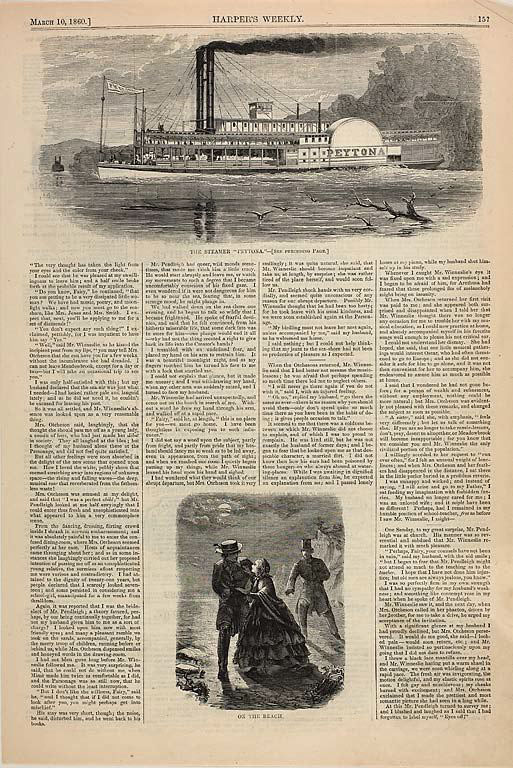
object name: Print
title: On the Beach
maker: Winslow Homer (American, 1836-1910); published by Harper's Weekly (American, 1857-1916)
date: published March 10, 1860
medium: Wood engraving on paper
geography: United States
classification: wood engraving; print; prints and drawing